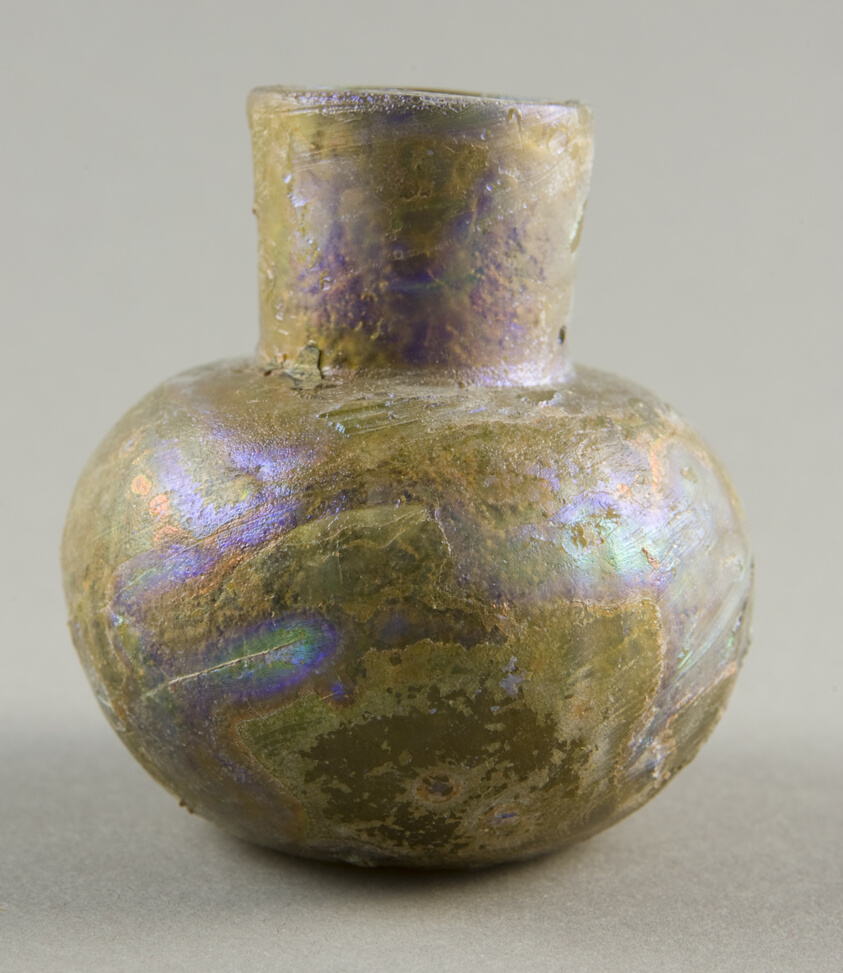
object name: Vessel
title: Bottle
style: ancient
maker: Roman or Byzantine; Sidon, Lebanon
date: 3rd-6th century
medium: Glass, blown technique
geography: Mediterranean Region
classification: glass; vessel; ancient art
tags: bottles